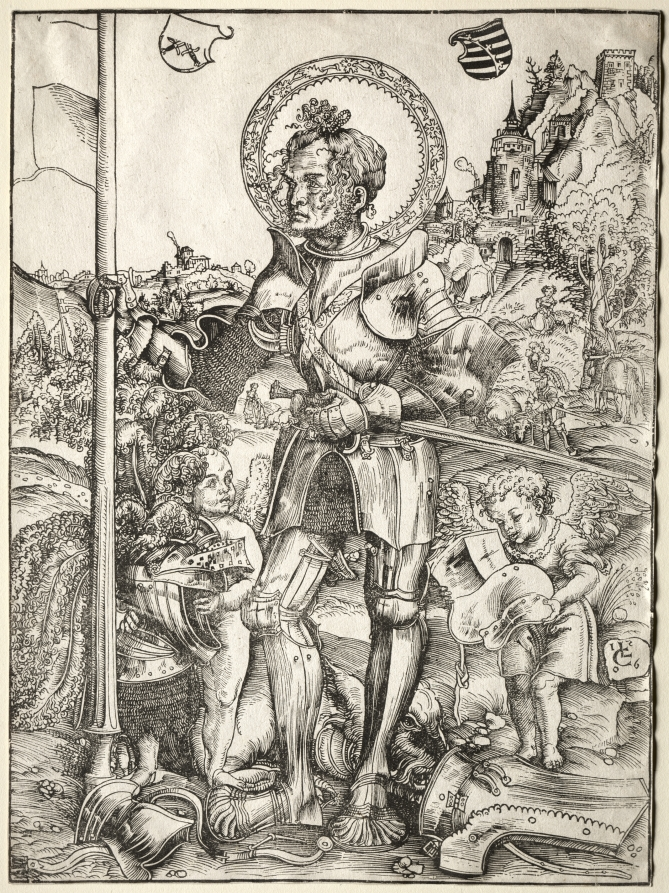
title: Saint George Standing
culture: Germany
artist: Lucas Cranach (German, 1472–1553)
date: 1506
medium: woodcut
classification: Print